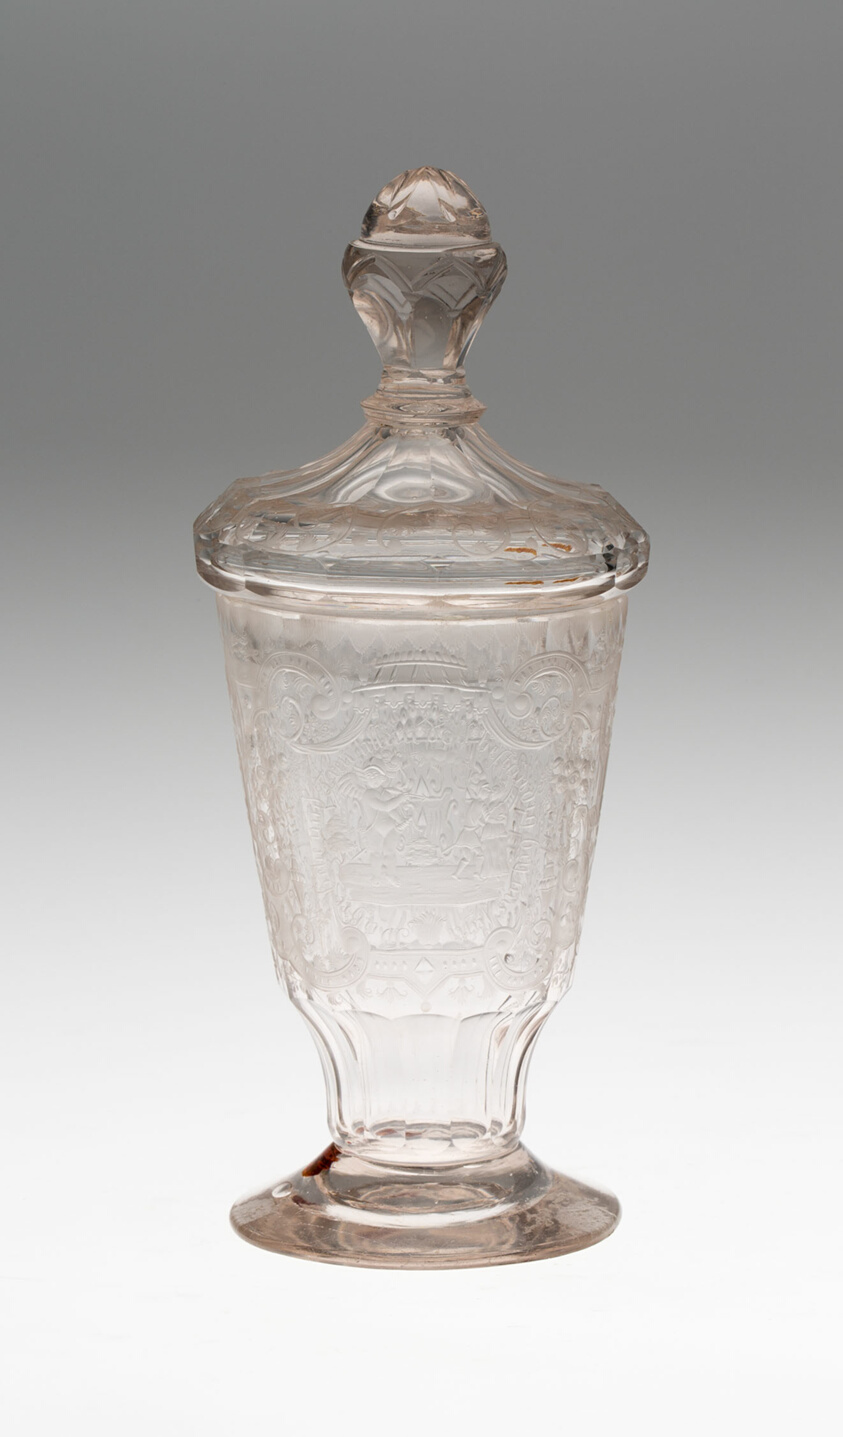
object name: Glass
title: Goblet with Cover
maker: Germany, Schleswig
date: c. 1730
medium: Glass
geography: Schleswig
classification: drinking vessel; glass; european decorative arts